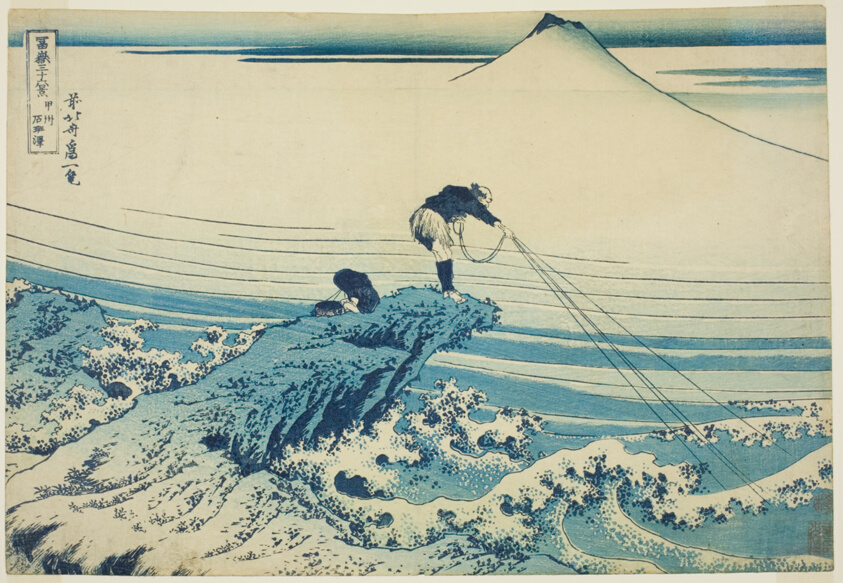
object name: Print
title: Kajikazawa in Kai Province (Koshu Kajikazawa), from the series "Thirty-six Views of Mount Fuji (Fugaku sanjurokkei)"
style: Japanese (culture or style)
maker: Katsushika Hokusai 葛飾 北斎; Japanese, 1760-1849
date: c. 1830/33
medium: Color woodblock print; oban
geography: Japan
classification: woodblock print; print; asian art